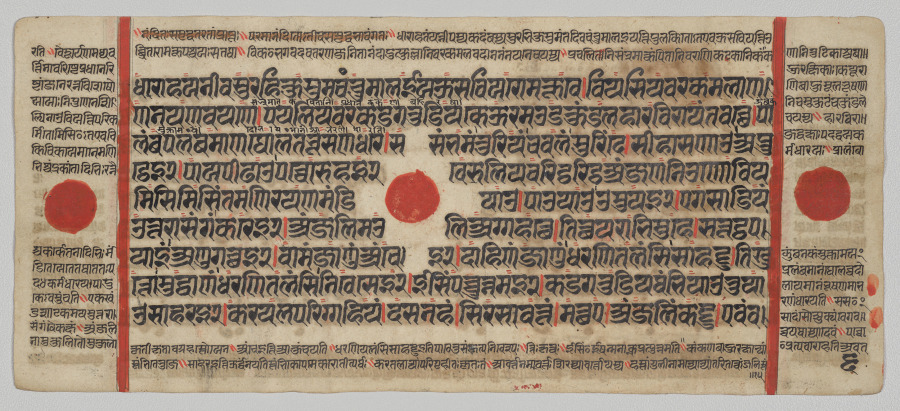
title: Text, Folio 6 (verso), from a Kalpa-sutra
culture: Western India, Gujarat, last quarter of the 15th century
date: c. 1475–1500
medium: Gum tempera, ink, and gold on paper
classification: Painting